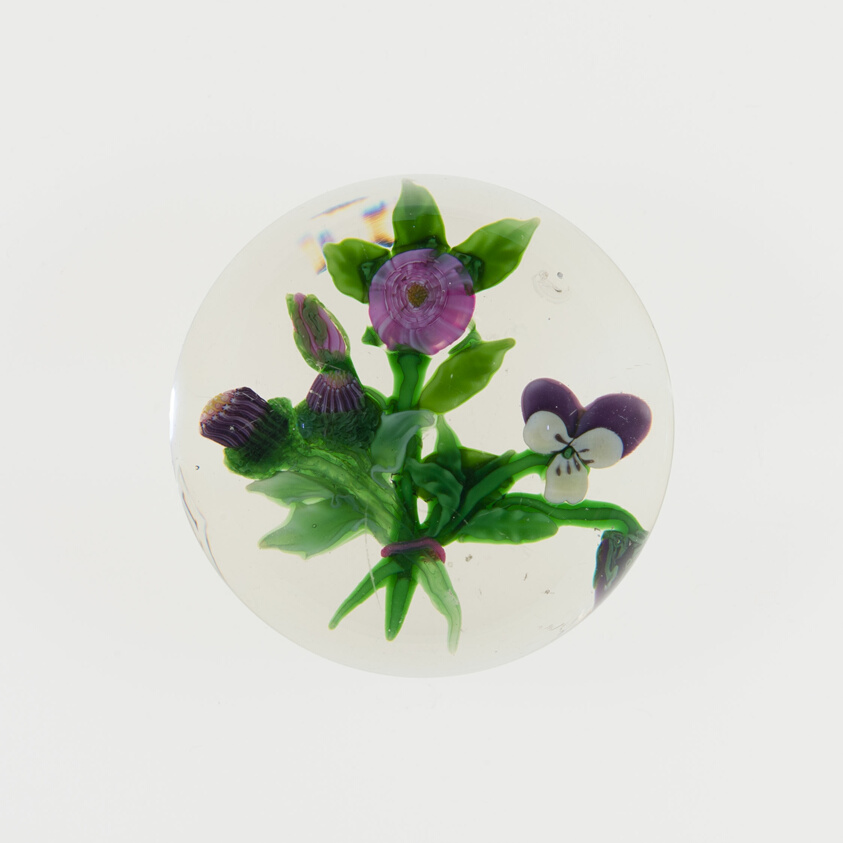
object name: Glass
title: Paperweight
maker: Clichy Glassworks (Cristalleries de Clichy); Clichy, France, 1837-1885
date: c. 1845/60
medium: Glass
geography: France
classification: paperweight; glass